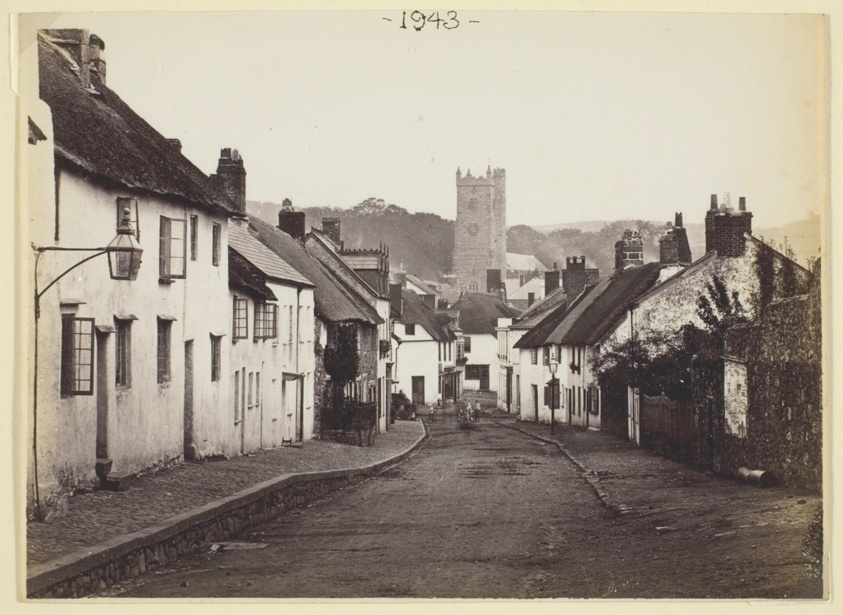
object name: Photograph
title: Untitled (Moretonhampstead, England)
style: 19th century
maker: Francis Bedford (English, 1816–1894)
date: 1870s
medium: Albumen print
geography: England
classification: albumen silver print; photographic process; photography; photograph